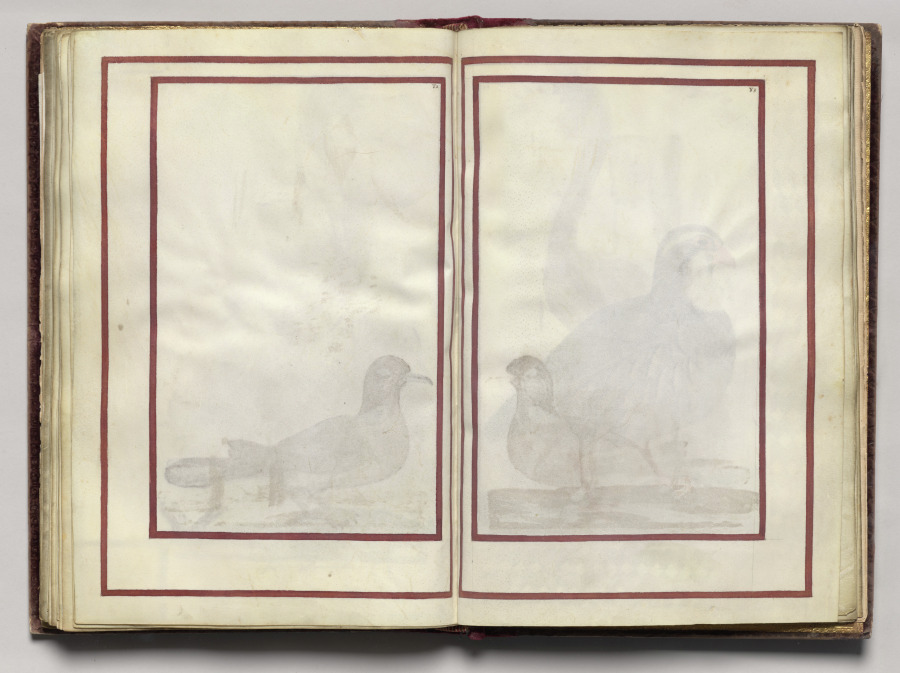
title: Border, folio 39 (verso), from Florilegium (A Book of Flower Studies)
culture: France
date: 1608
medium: watercolor, ink, silver and gold over occasional traces of pencil, on vellum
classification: Bound Volume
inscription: Dated: Poitiers 1608 (on frontispiece) Signed: On frontispiece in black ink, lower right: Van Kuyk Notation on drawing: Frontispiece: in pencil, lower margin: * élève de Van Kessel, peintre flammand (* in pencil also appears in front of Van Kuyk's name).